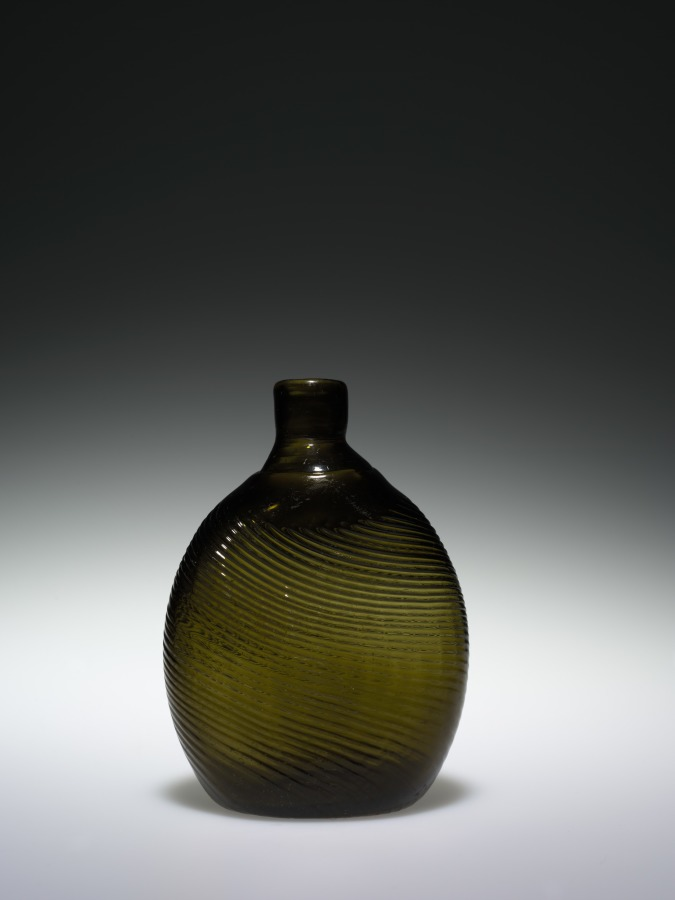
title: Pitkin Flask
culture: America, Ohio or Mid-Western, 19th century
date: 1800s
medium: glass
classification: Glass